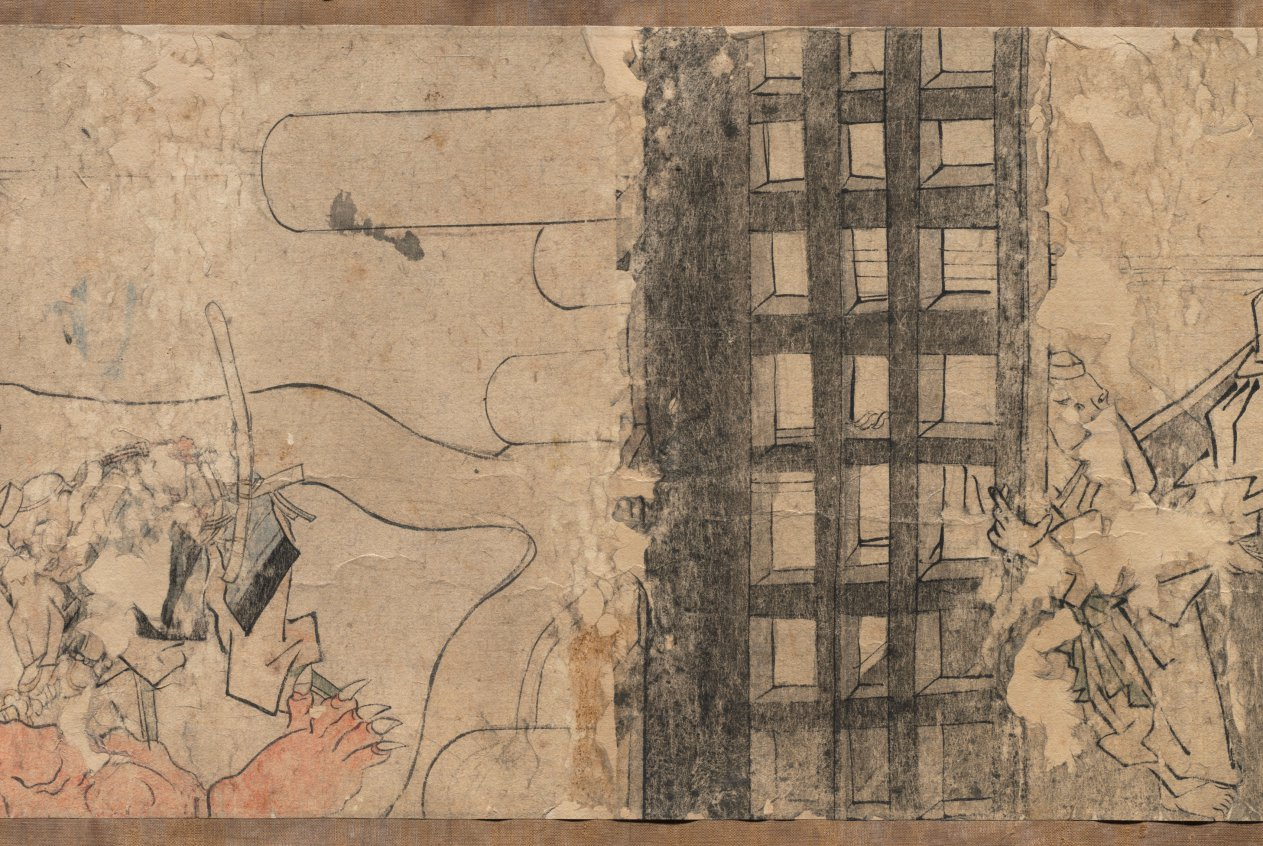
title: Oeyama Engi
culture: Japan, Edo period (1615–1868)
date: 1615–1868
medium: one of a pair of handscrolls; ink and color on paper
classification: Painting